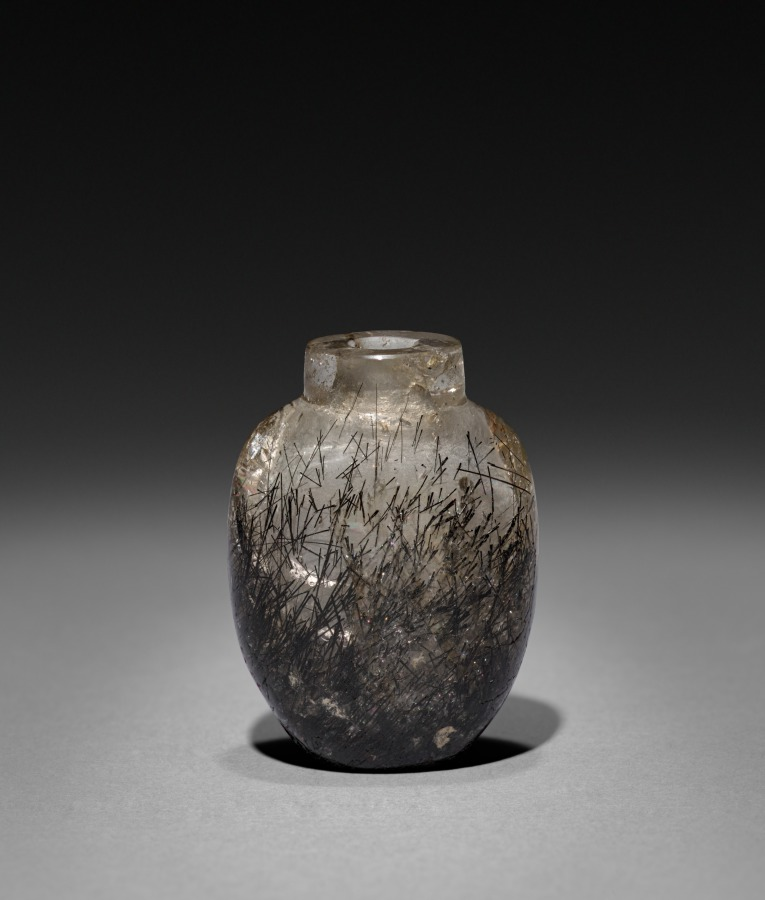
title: Snuff Bottle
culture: China, Qing dynasty (1644-1911)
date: 1644–1911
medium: glass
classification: Glass